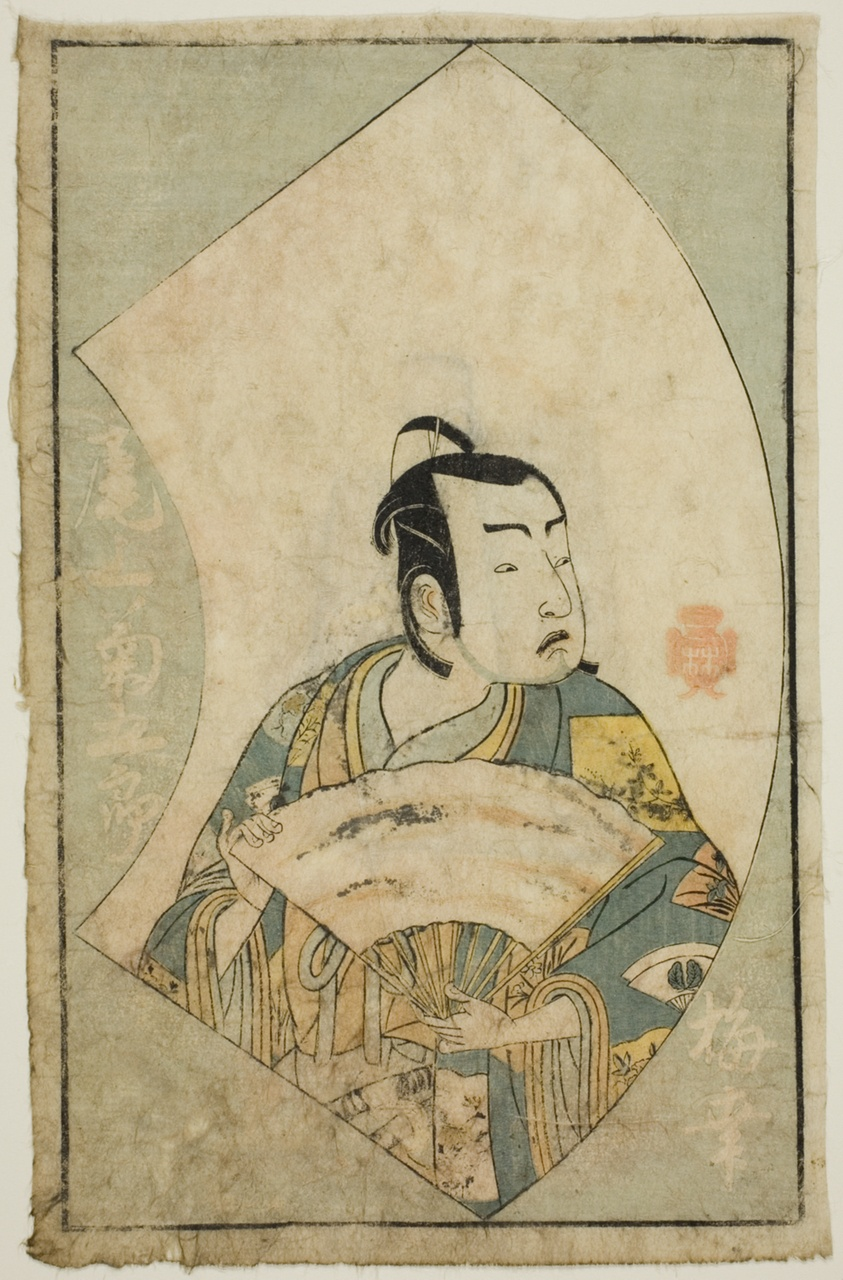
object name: Print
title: The Actor Onoe Kikugoro I, from "A Picture Book of Stage Fans (Ehon butai ogi)"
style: Japanese (culture or style)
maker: Katsukawa Shunsho 勝川 春章; Japanese, 1726-1792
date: 1770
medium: Color woodblock print; page from illustrated book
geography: Japan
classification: woodblock print; print; asian art